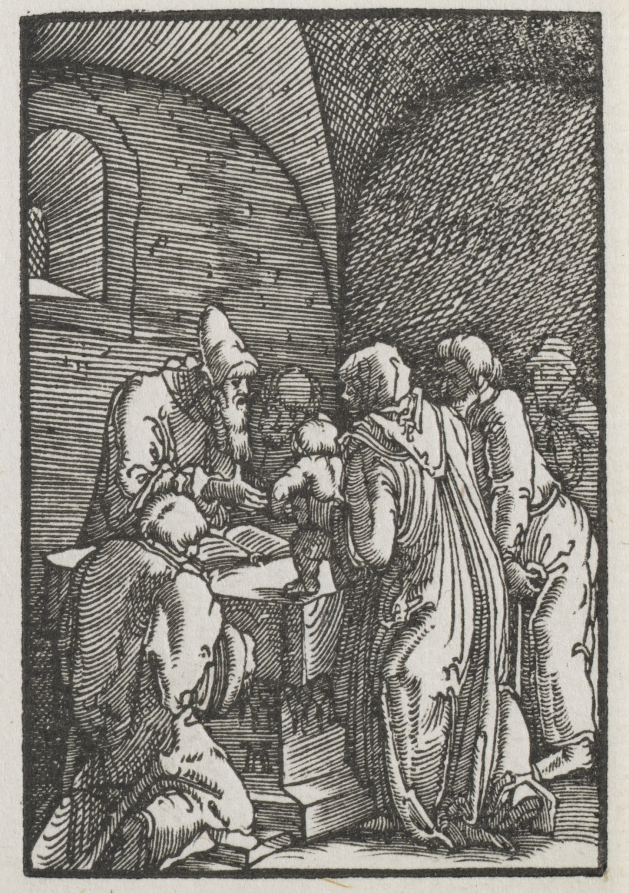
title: The Fall and Redemption of Man: The Presentation of Christ in the Temple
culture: Germany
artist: Albrecht Altdorfer (German, c. 1480–1538)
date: c. 1515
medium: woodcut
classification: Print